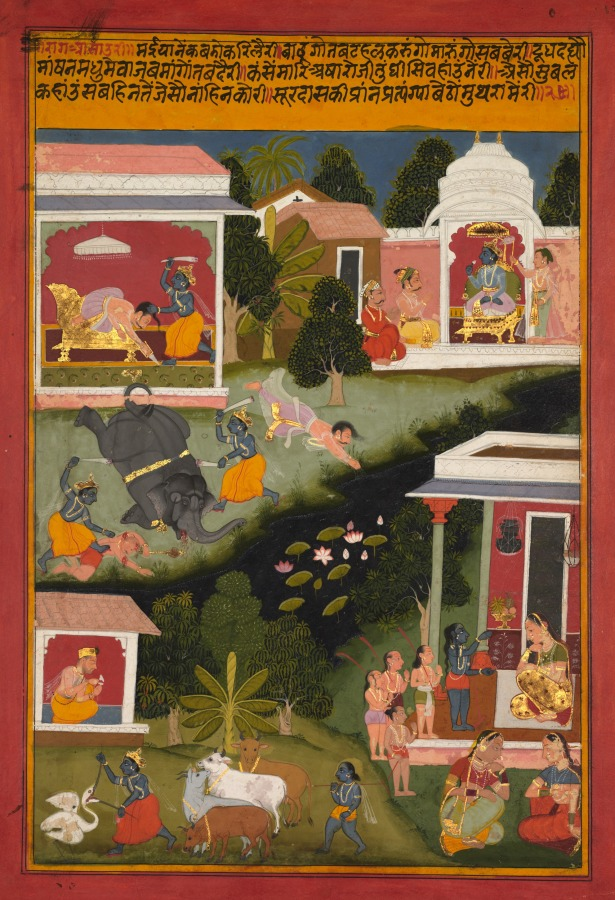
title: Krishna asks for sweets, from a Sursagar of Surdas (Indian, c. 1480–1580)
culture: Northwestern India, Rajasthan, Rajput Kingdom of Mewar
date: 1705–10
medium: Gum tempera, ink, and gold on paper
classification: Painting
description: The heart of the scene is at the lower right, where the blue Hindu god Krishna as a boy is trying to persuade his foster mother Yashoda to give him more food. He is in the process of telling her that he needs extra treats so he can grow big to accomplish all the exploits depicted in the remainder of the page: herding cattle, killing demons, defeating wrestlers, and finally winning the throne of Mathura, as seen in the upper right where he sits crowned king in place of his evil uncle Kamsa.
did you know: In the hut at the lower left sits the blind poet, author of the verse at the top of the page.